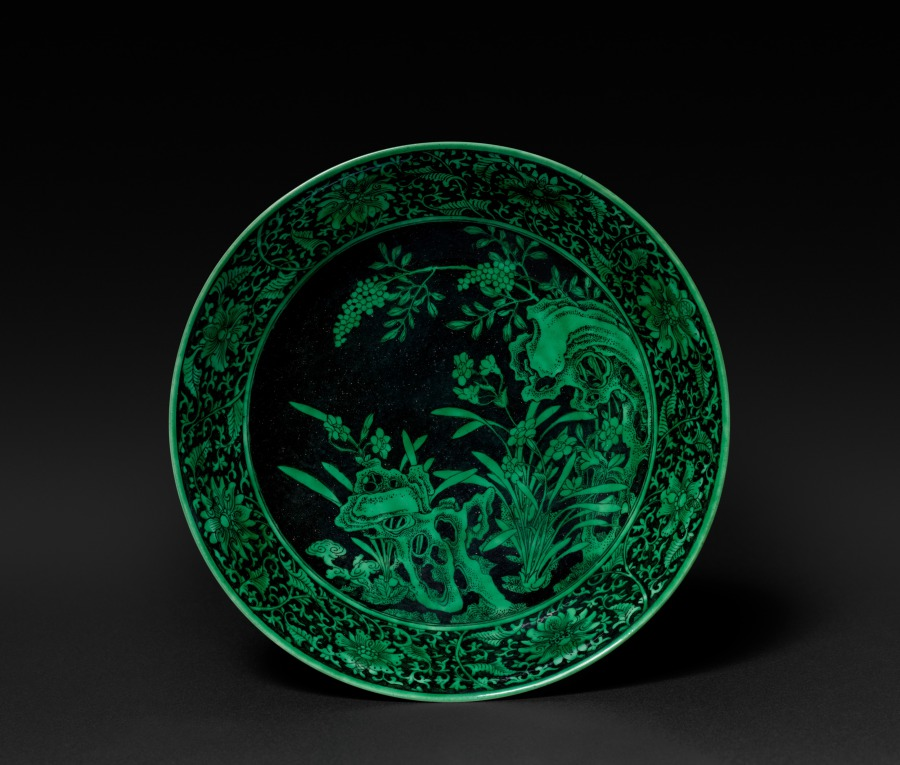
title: Dish with Narcissus and Rocks (interior); Floral Scrolls (exterior)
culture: China, Jiangxi province, Jingdezhen kilns, Qing dynasty (1644-1911), Yongzheng mark and reign (1722-35)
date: 1723–35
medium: Porcelain painted in overglaze-black with a green glaze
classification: Ceramic